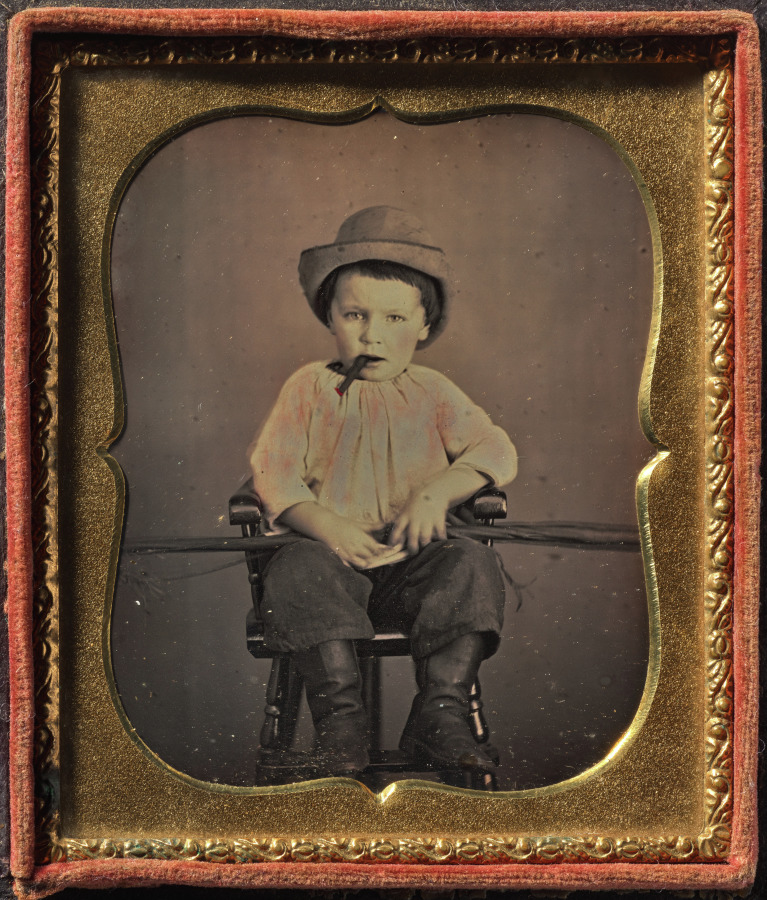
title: Boy with Cigar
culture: America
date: c. 1855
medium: daguerreotype, tinted, sixth plate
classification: Photograph